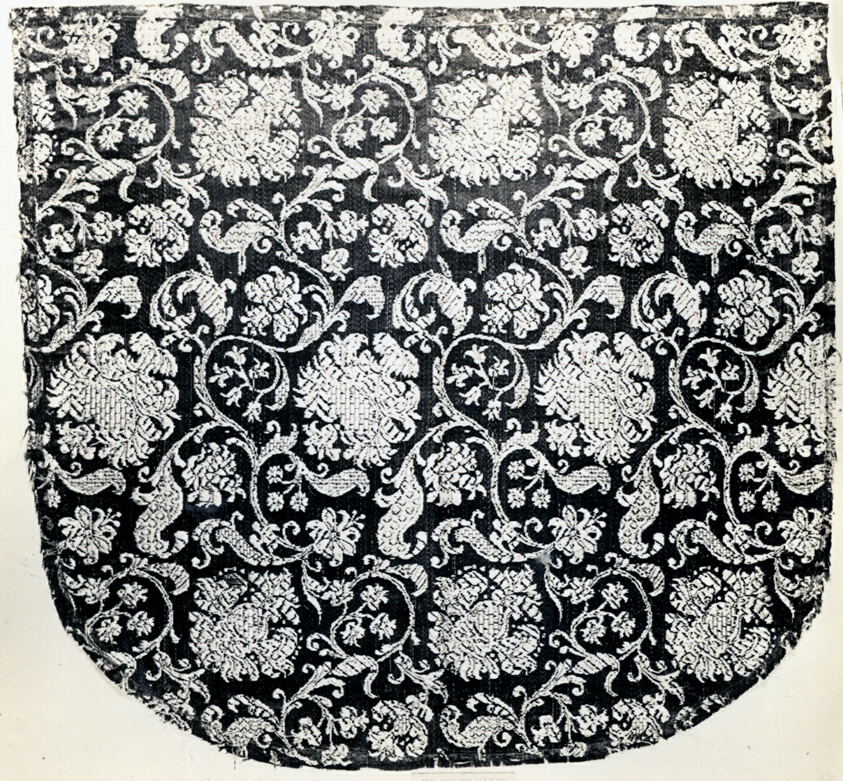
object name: Textile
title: Fragment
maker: France or Italy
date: Mid–17th century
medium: Silk, plain compound satin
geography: France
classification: textile; weaving